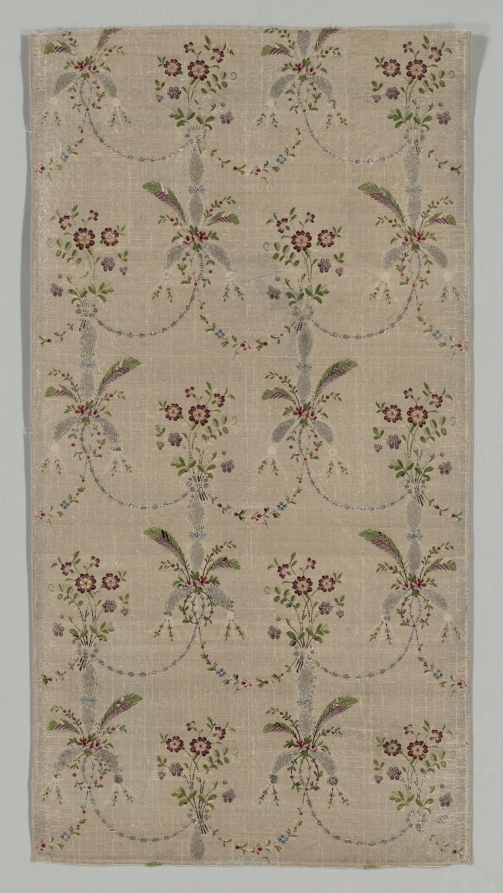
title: Textile Fragment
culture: France, 18th century, period of Louis XV (1723-1774)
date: 1723–1774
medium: plain compound cloth, brocaded; silk; some details appliqued and embroidered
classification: Textile